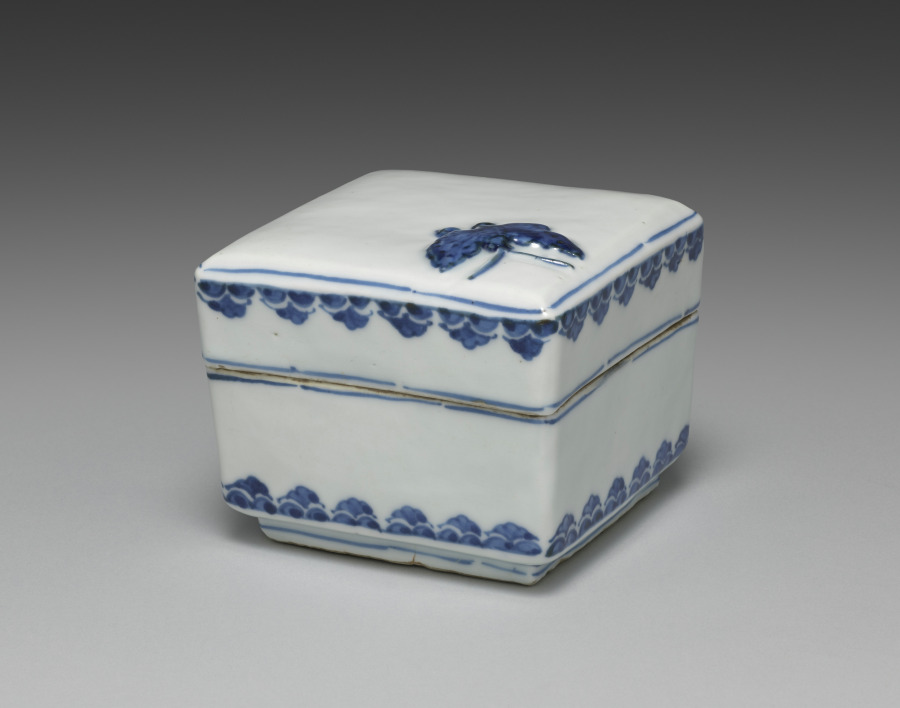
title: Box with Butterfly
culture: Japan, Meiji period (1868–1912)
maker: Seifū Yohei I (Japanese, 1801–1861)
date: 1855–57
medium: Porcelain with underglaze blue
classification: Ceramic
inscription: 清風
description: This sturdy box, with comparatively thick walls and resulting heft, is sparsely decorated with a single butterfly motif in dark underglaze blue cobalt in one corner of the lid and with repeating floral patterns along the lid and base. Single broken lines of underglaze blue define the edge of the box lid’s top where it curves to meet the sides and again where it meets the base of the box. Another blue band runs around the upper rim of the base where it meets the lip, left unglazed for a better grip of the lid when the box is closed. Yohei I’s signature on the center of the recessed base is set within a wide blue square. The porcelain box is meant to call to mind a famous story attributed to Zhuang Zhou (c. 369–286 BCE), also known as Master Zhuang, or Zhuangzi, pronounced Soji in Japanese. The second chapter of Zhuangzi, his eponymous collection of anecdotes, records the story as follows: Once, Zhuang Zhou dreamt he was a butterfly, a butterfly flitting and fluttering about, happy with himself and doing as he pleased. He didn’t know that he was Zhuang Zhou. Suddenly, he woke up and there he was, solid and unmistakable Zhuang Zhou. But he didn’t know if he was Zhuang Zhou who had dreamt he was a butterfly, or a butterfly dreaming that he was Zhuang Zhou. Between Zhuang Zhou and the butterfly there must be some distinction! This is called the Transformation of Things. The lidded box resembles kosometsuke, the porcelains in underglaze blue made to order or on speculation for the Japanese market during the early to mid-1600s in Jingdezhen, China. These works were often made from designs submitted by Japanese clients, many of whom were masters of chanoyu, who sought the wares for their tea practice. The relative roughness of the clay and the distortions in the fired object were intentional, as they created the rustic effect desired by Japanese tea communities.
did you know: It is possible that the model for this box was a smaller lidded box meant for storing incense.